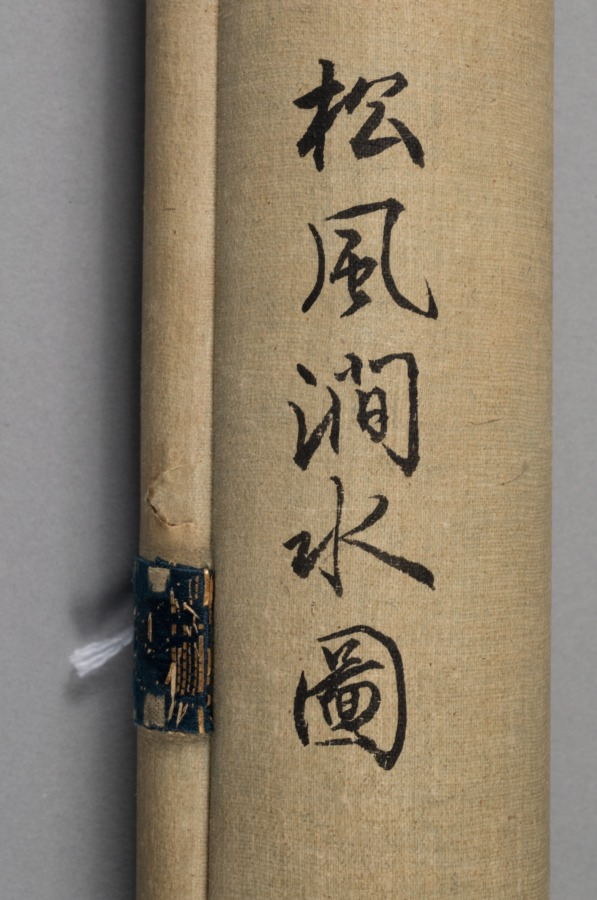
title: Landscape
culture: Japan, possibly Edo period (1615-1868)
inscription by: copy after Ishō Tokugan (Japanese, c. 1359–1437)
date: early 1600s to mid-1800s?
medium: hanging scroll; ink and slight color on paper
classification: Painting